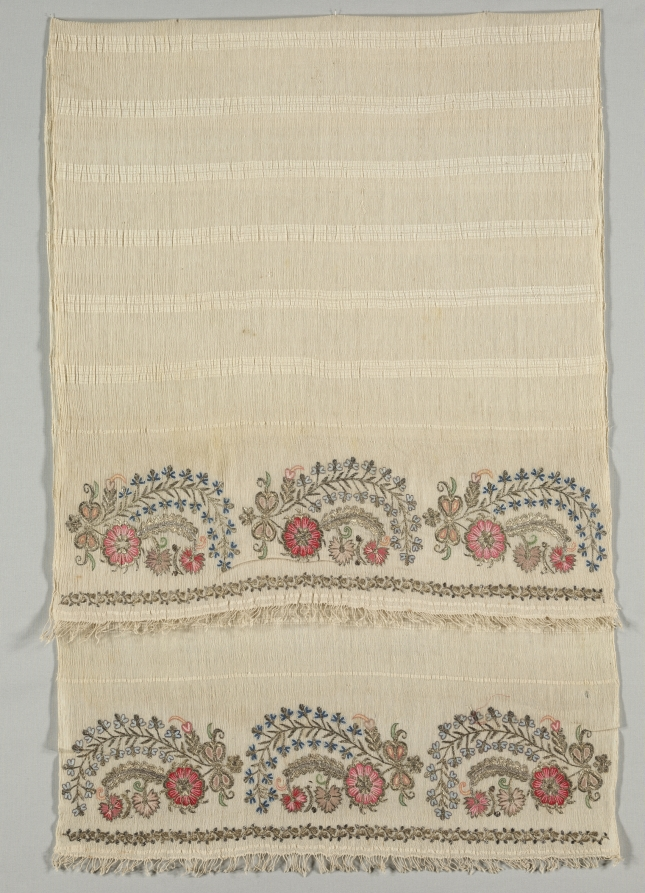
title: Embroidered Towel (Havlu)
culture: Turkey, 19th century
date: 19th century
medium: embroidery: silk, gold and silver filé, and gold strip pushed through silk, bent and pressed into place, on cotton tabby ground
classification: Embroidery